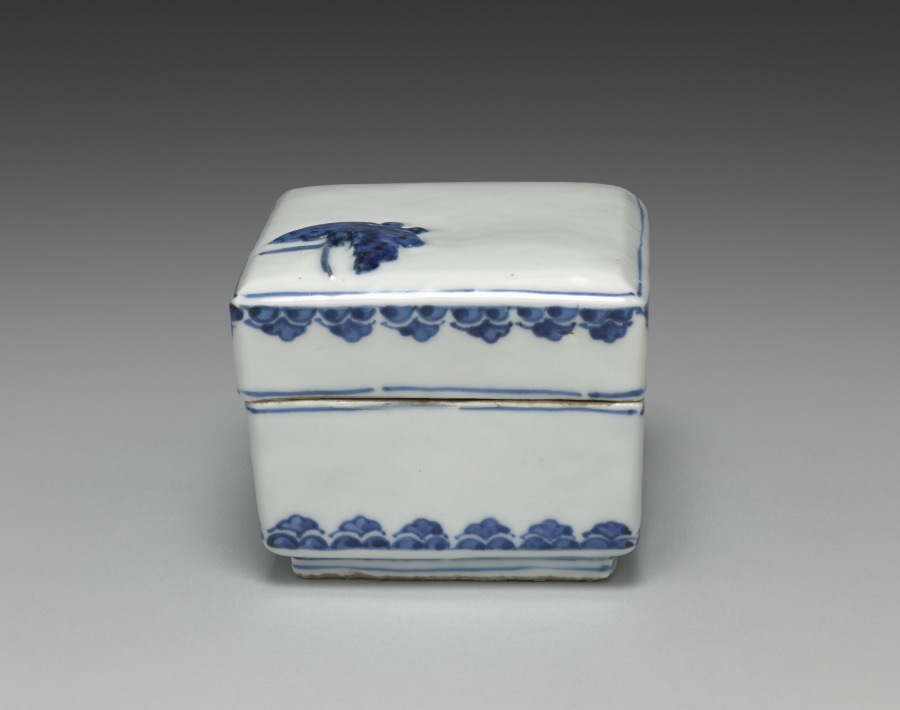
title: Box with Butterfly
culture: Japan, Meiji period (1868–1912)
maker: Seifū Yohei I (Japanese, 1801–1861)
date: 1855–57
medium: Porcelain with underglaze blue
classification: Ceramic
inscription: 清風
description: This sturdy box, with comparatively thick walls and resulting heft, is sparsely decorated with a single butterfly motif in dark underglaze blue cobalt in one corner of the lid and with repeating floral patterns along the lid and base. Single broken lines of underglaze blue define the edge of the box lid’s top where it curves to meet the sides and again where it meets the base of the box. Another blue band runs around the upper rim of the base where it meets the lip, left unglazed for a better grip of the lid when the box is closed. Yohei I’s signature on the center of the recessed base is set within a wide blue square. The porcelain box is meant to call to mind a famous story attributed to Zhuang Zhou (c. 369–286 BCE), also known as Master Zhuang, or Zhuangzi, pronounced Soji in Japanese. The second chapter of Zhuangzi, his eponymous collection of anecdotes, records the story as follows: Once, Zhuang Zhou dreamt he was a butterfly, a butterfly flitting and fluttering about, happy with himself and doing as he pleased. He didn’t know that he was Zhuang Zhou. Suddenly, he woke up and there he was, solid and unmistakable Zhuang Zhou. But he didn’t know if he was Zhuang Zhou who had dreamt he was a butterfly, or a butterfly dreaming that he was Zhuang Zhou. Between Zhuang Zhou and the butterfly there must be some distinction! This is called the Transformation of Things. The lidded box resembles kosometsuke, the porcelains in underglaze blue made to order or on speculation for the Japanese market during the early to mid-1600s in Jingdezhen, China. These works were often made from designs submitted by Japanese clients, many of whom were masters of chanoyu, who sought the wares for their tea practice. The relative roughness of the clay and the distortions in the fired object were intentional, as they created the rustic effect desired by Japanese tea communities.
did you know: It is possible that the model for this box was a smaller lidded box meant for storing incense.